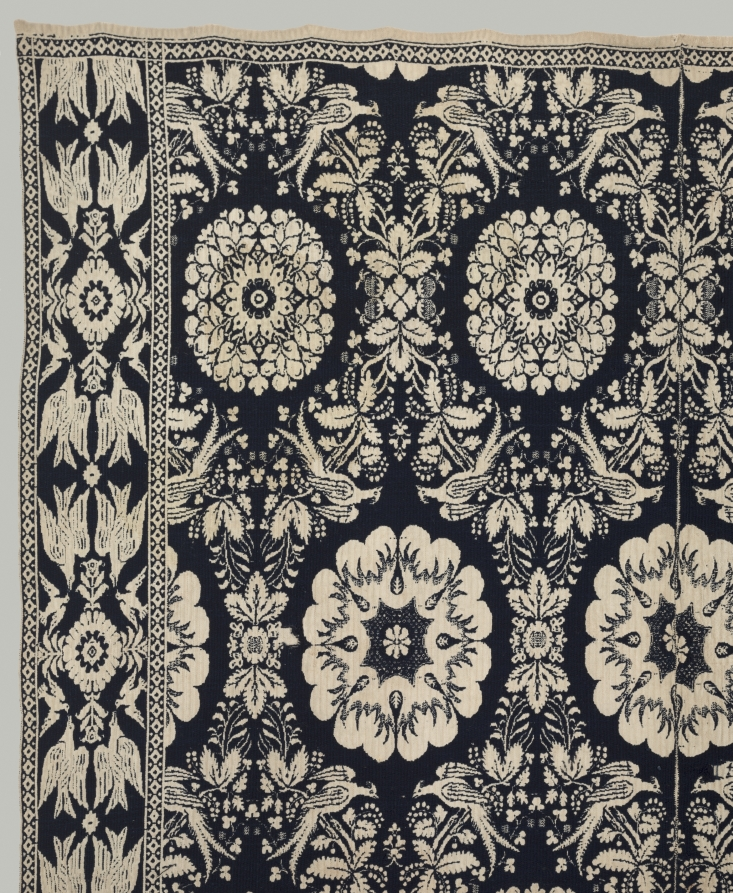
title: Coverlet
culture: America, New York ?, mid 19th century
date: mid 19th century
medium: double wool weave: wool and cotton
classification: Textile